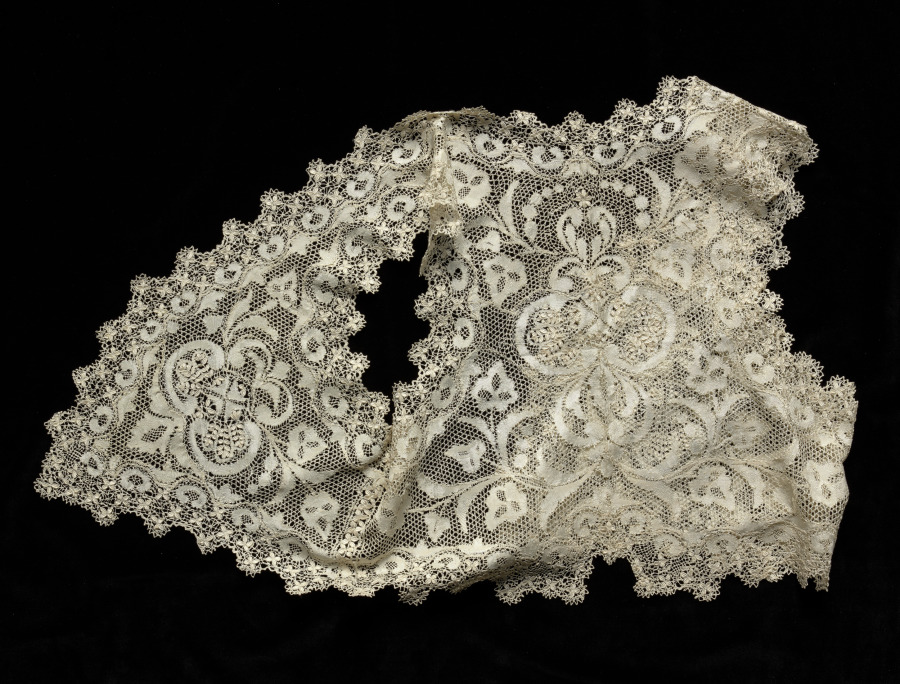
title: Bolero Style Lace Jacket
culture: Malta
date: 1800s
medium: Silk: bobbin lace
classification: Lace